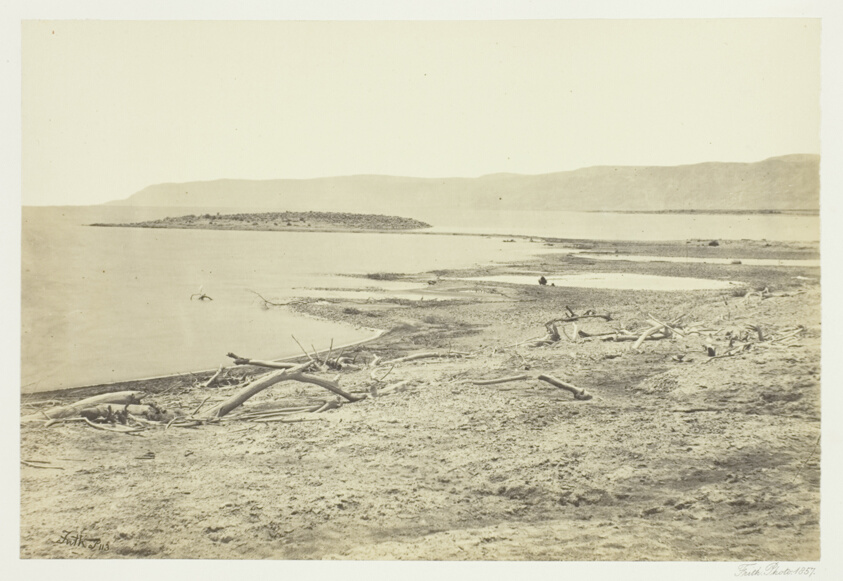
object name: Photograph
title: The North Shore of the Dead Sea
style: 19th century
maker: Francis Frith (English, 1822–1898)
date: 1857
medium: Albumen print, pl. 37 from the album "Egypt and Palestine, Volume I" (1858)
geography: England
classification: photograph; albumen silver print; photography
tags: Collected by Hugh Edwards, Egypt and Palestine